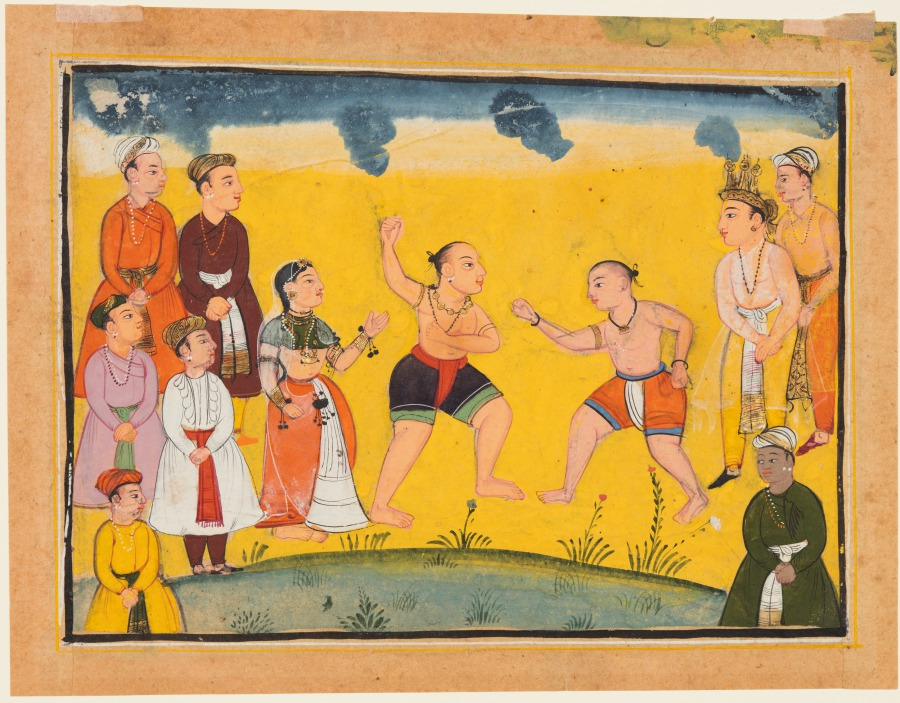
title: Draupadi Rescued from Abduction, from a Mahabharata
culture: Northern India, Popular Mughal School, probably done at Bikaner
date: c. 1615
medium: gum tempera, ink, and gold on paper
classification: Painting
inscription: jayadratha na kaiṃsoṃ dūpadī chuḍāyalī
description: Bhima and Jayadrath, dressed like wrestlers, duel while his four brothers (Pandavas) and their noble attendants look on. Bhima appears to be the wrestler taller in stature and wears a necklace of bells, and Jayadratha is the one wearing an orange loincloth. Draupadi stands behind Bhima, already being rescued from Jayadratha’s clutches.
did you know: Draupadi had five husbands, the Pandava brothers.